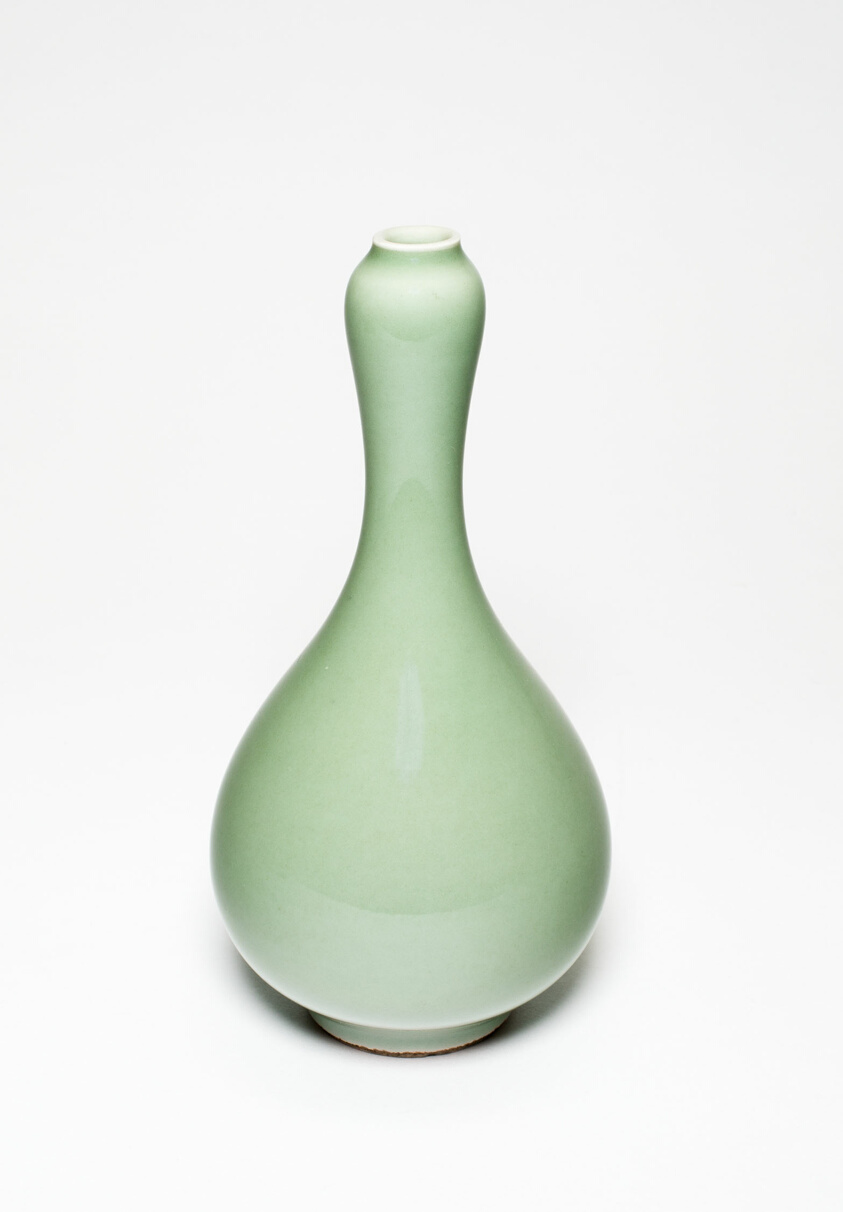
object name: Vessel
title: Pear-Shaped Vase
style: Chinese (culture or style)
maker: China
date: Qing dynasty (1644–1911), 18th/19th century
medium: Celadon-glazed porcelain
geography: China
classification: vase; porcelain; vessel; asian art; ceramics